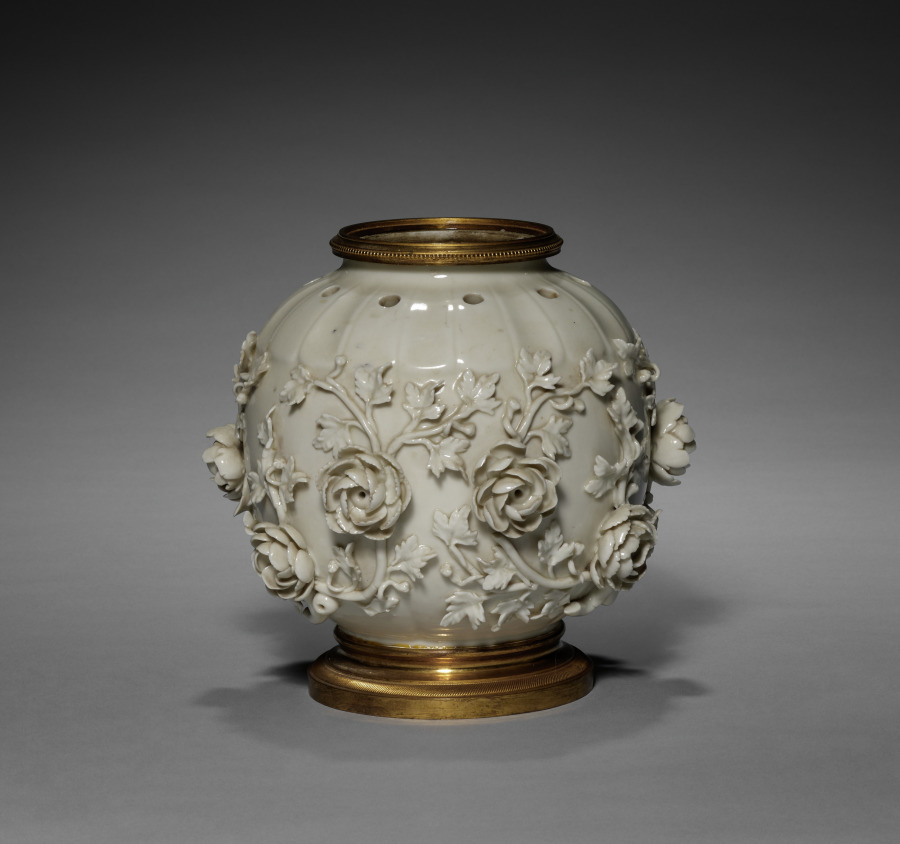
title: Potpourri Vase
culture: France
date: 1860–1880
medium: blanc-de-chine porcelain; gilt bronze mount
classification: Ceramic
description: This vase—part of a pair of covered vases—was created to contain potpourri, a mixture of flowers, herbs, and spices emitting ambient fragrance. This specific function offered a particularly fertile ground for the development of French porcelain from the mid-1700s, as manufactories experimented with forms, surface ornamentations, and placement of perforations. Produced by the firm of Edmé Samson in the 1800s, the vases pay homage to this history. While using updated technique and material, as well as more exuberant decorations, these vases draw upon designs by earlier innovators such as the Saint-Cloud manufactory.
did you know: Potpourri vases always have holes in the top to let the scent of dried spices and flowers contained within freshen the air around them.